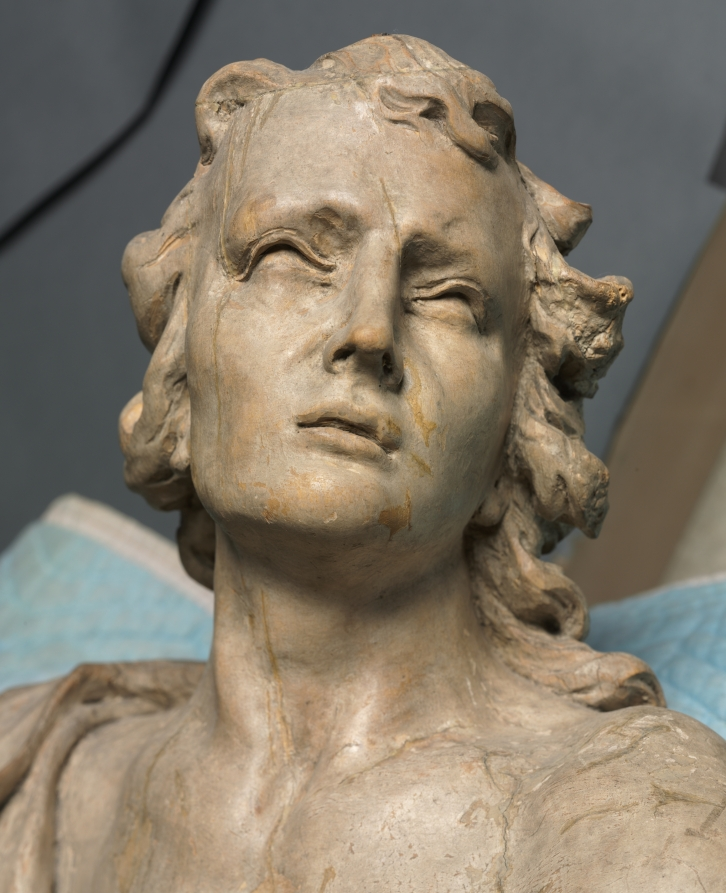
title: A Saint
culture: Germany or Austria, 18th century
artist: follower of Diego Francesco Carlone (Italian, 1674–1750)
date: c. 1730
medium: wood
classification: Sculpture